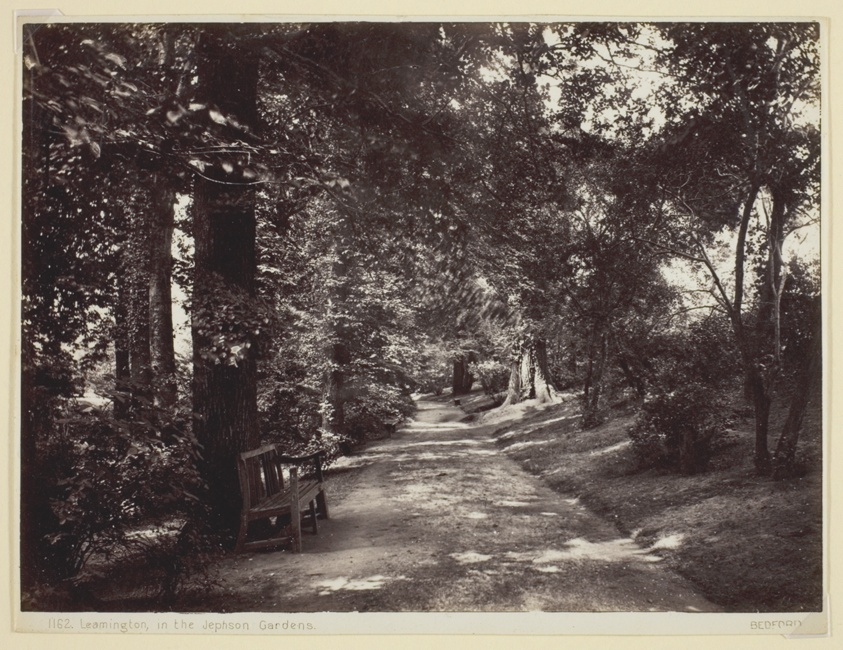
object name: Photograph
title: Leamington, in the Jephson Gardens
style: 19th century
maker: Francis Bedford (English, 1816–1894)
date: 1860/94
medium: Albumen print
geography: England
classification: albumen silver print; photographic process; photography; photograph